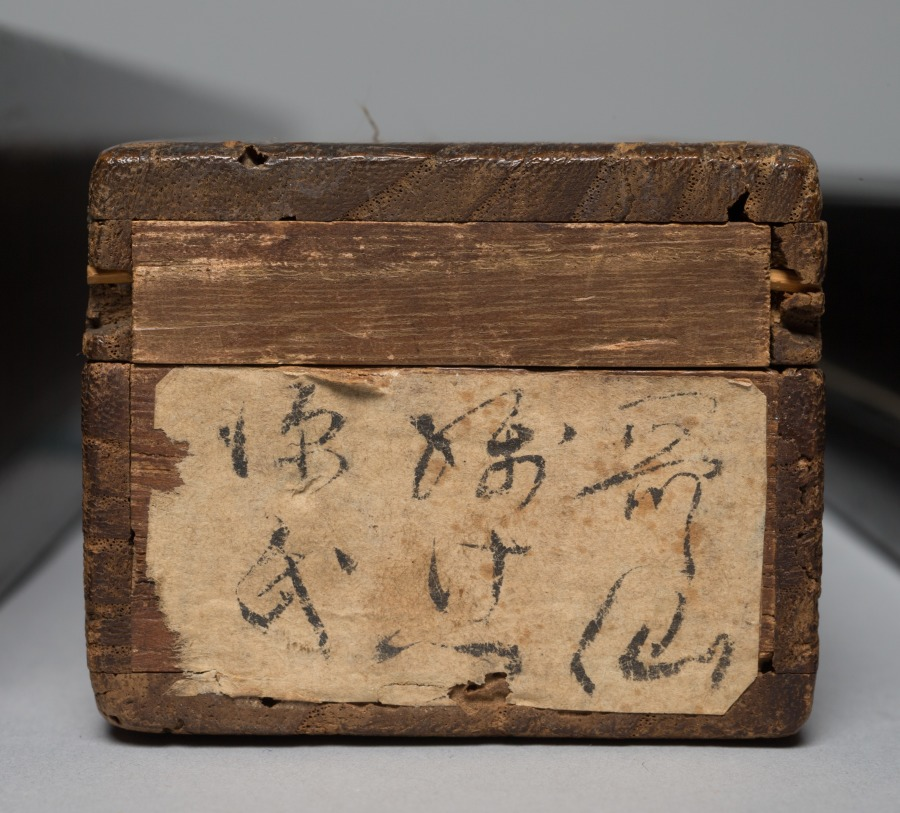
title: Section of an Illustrated Tale of Genji Poetry Contest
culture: Japan, Muromachi period (1392–1573)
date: 1400s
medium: section of a handscroll mounted as a hanging scroll; ink on paper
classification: Painting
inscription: 四十六番 左 ひげくろの大将 心さえ空にみだれし雪の［も」夜に ひとりさえつるかたしきの袖／ 四十七番 うきことを思ひさわ げばさまざまに くゆるけむりぞ いとど たち そふ／ 四十八番 すがくれてかず にも あらぬ かりのこを いづかたにかはとりかくすべき／ 右 雲井のかり かぎりとてわすれがたきを わするるも こや世に なびくこころな るらむ／ あさきなを いひ ながしける かわ ぐちは いかが もらしし せきのあらがき／ あわれをもいかに しりてか なぐさ めむ あるや 恋しき なきや かなしきに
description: This hanging scroll was once part of a handscroll depicting a waka (thirty-one syllable verse) poetry contest between characters from the 11th-century literary classic Tale of Genji. In this section, a woman known informally as Kumoi no kari, or “Goose in Fog,” after a lovelorn line she hums in the novel, is pitted against Higekuro no taishō, or “General Blackbeard.” Three of his poems, numbered 46 to 48, from “The Handsome Pillar” chapter appear over his image. The subsequent three poems inscribed above Kumoi no kari are presented as her “responses,” and come from "The Plum Tree Branch", “New Wisteria Leaves”, and "Evening Mist" chapters.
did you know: General Blackbeard laments having smelly ash poured upon him by his angry wife in one of the poems.